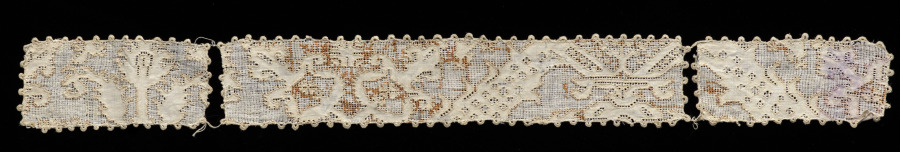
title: Collar and Cuffs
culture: Italy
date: 1800s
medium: Linen: needle lace (drawnwork)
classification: Lace